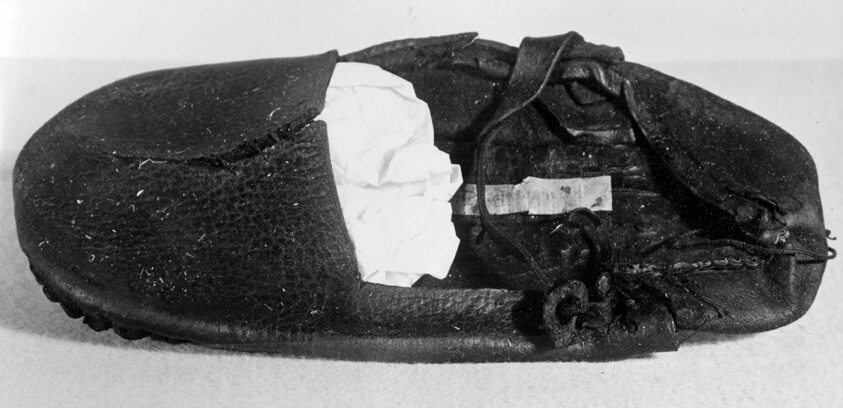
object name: Textile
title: Shoe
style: elizabethan, tudor, european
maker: England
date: 16th century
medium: Leather with one strap and original buckle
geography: England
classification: textile; costume accessory - shoe; shoes - misc; costume; dress (garment); clothing